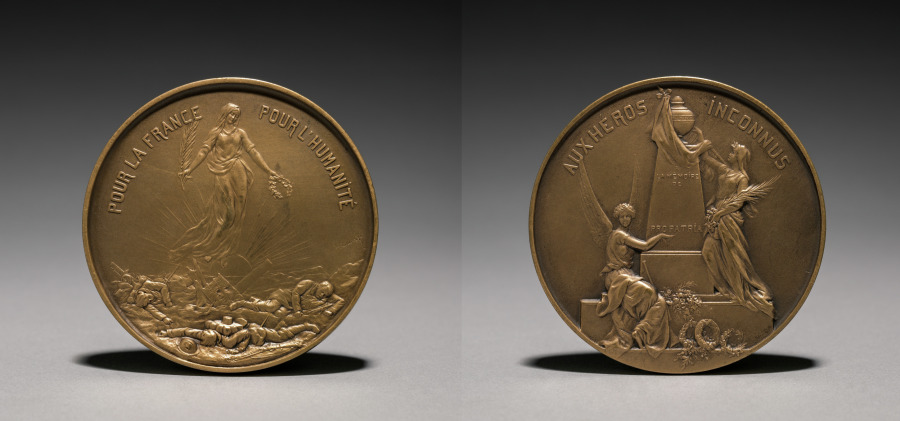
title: Medallion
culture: France, 19th-20th century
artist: Henri Emile Allouard (French, 1844–1929)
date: 1917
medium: bronze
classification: Metalwork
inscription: "Aux héros inconnus. À la memoire de . . . pro patria."